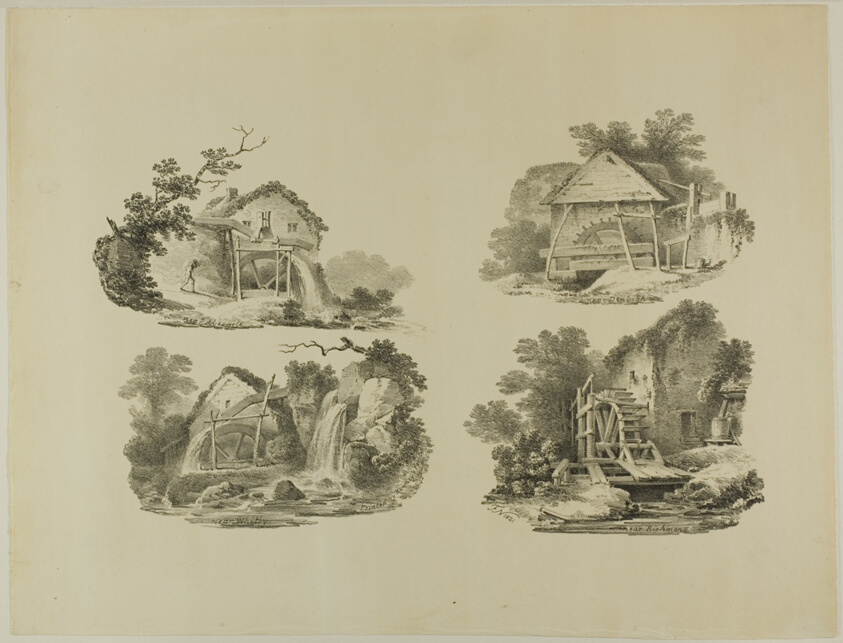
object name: Print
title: Mill Wheels near Abergele, Denbigh, Whitby, Richmond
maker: Attributed to Francis Nicholson; English, 1753-1844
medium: Lithograph on paper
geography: England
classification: lithograph; print; prints and drawing